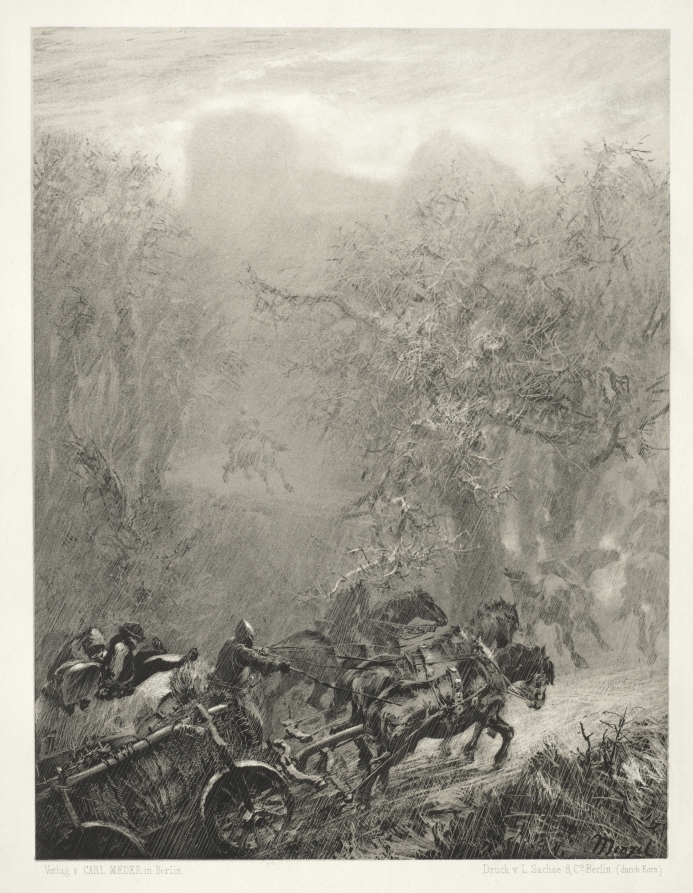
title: Essay on Stone with Brush and Scraper: The Convoy of Prisoners through a Woods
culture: Germany, 19th century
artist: Adolph von Menzel (German, 1815–1905)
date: 1851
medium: lithograph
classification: Print